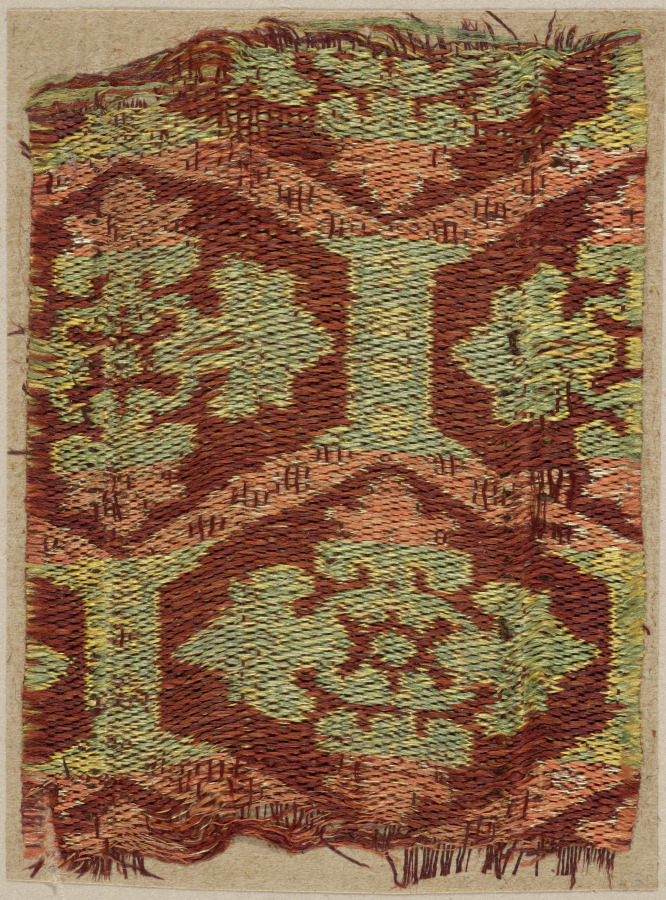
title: Fragment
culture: China or Japan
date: 700s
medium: compound twill, silk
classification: Textile